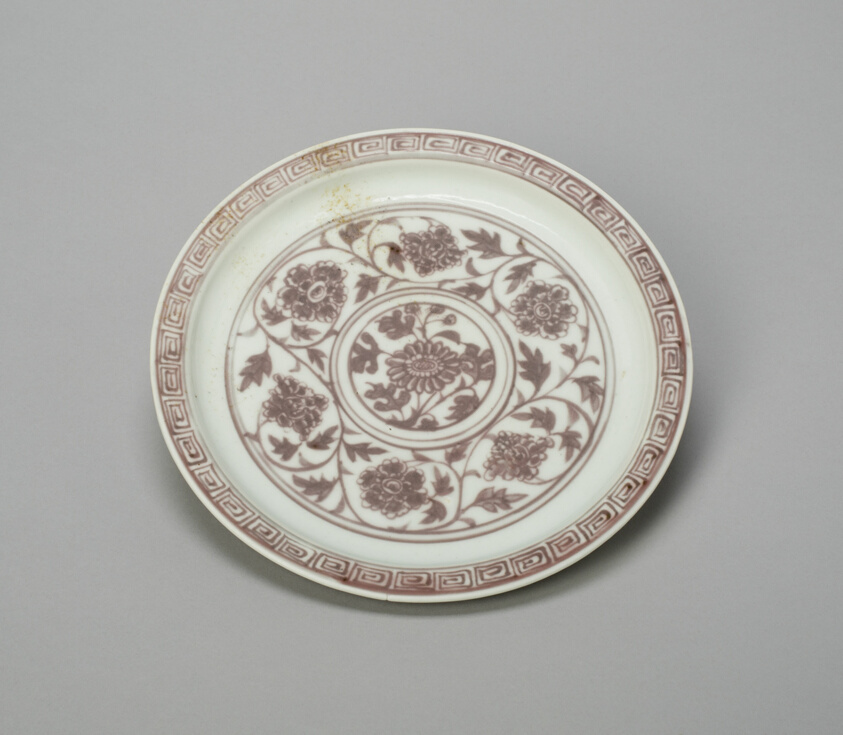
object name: Vessel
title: Shallow Dish with Peony Scrolls, Chrysanthemum Sprays, and Key-Fret Border; Lotus Panels Panels Under Rim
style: Chinese (culture or style)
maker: China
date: Ming dynasty (1368–1644), Hongwu period (1368–1388)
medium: Porcelain painted in underglaze blue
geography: China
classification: dish (vessel); porcelain; ceramics; asian art; vessel